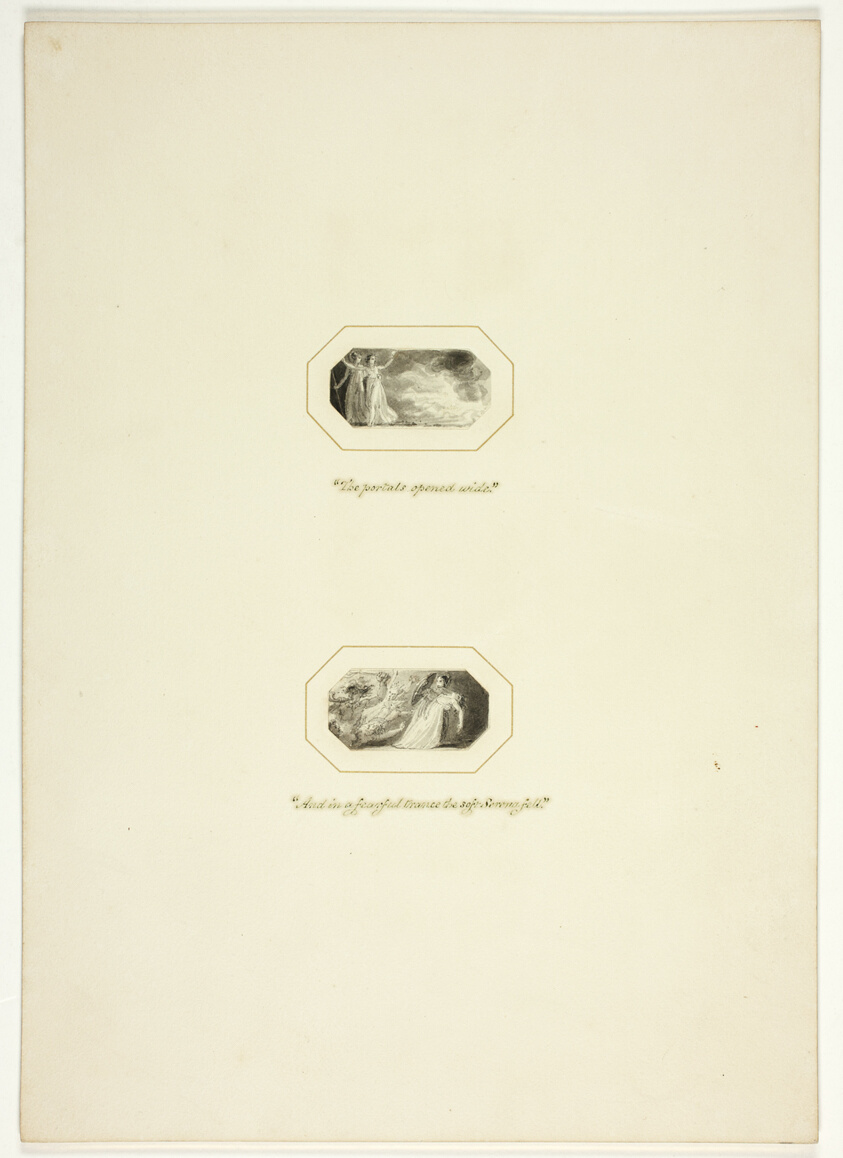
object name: Drawing and Watercolor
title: Study for a plate from The Triumphs of Temper, in the 1796 Royal Engagements Pocket Book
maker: Thomas Stothard (English, 1755-1834)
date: c. 1795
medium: Ink wash on paper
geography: England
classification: ink or chalk wash; drawings (visual works); prints and drawing